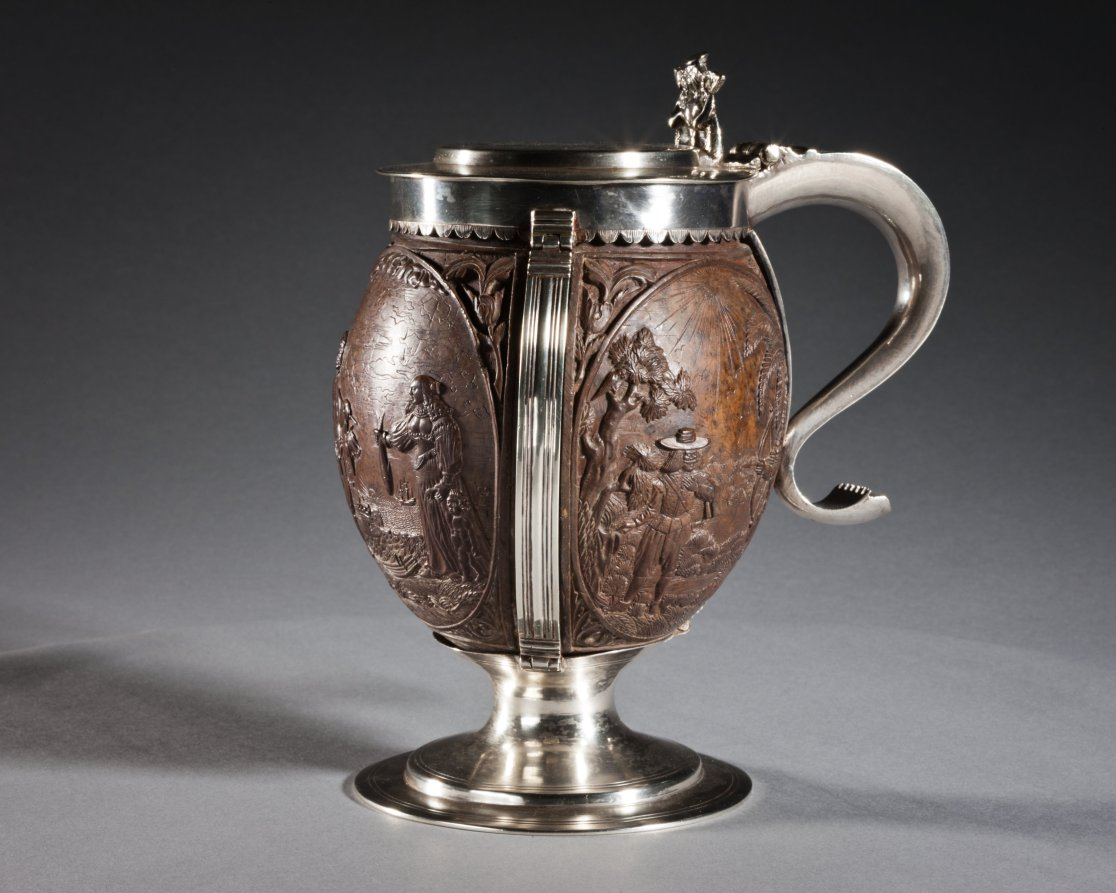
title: Coconut Cup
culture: carved coconut, probably The Netherlands; silver mount, probably England, 17th century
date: c. 1630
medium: carved coconut in silver mount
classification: Metalwork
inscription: top lid has engraved coat-of-arms, underside of lid has inscription: George Lewis TIVERTON Feby, 1st 1760.